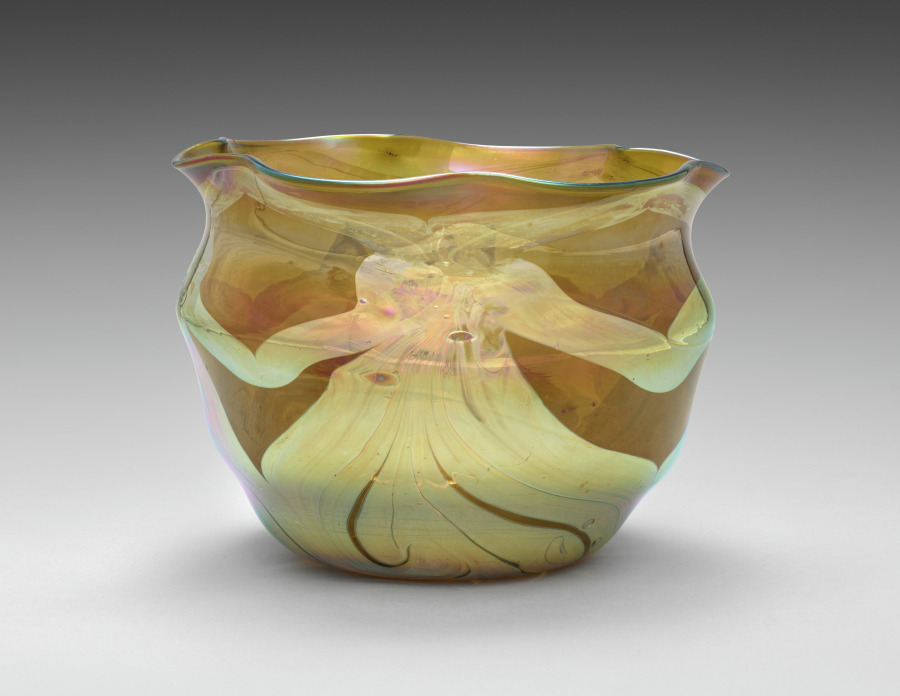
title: Bowl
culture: America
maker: Tiffany Glass & Decorating Company (America, New York, 1892–1902)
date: c. 1896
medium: Favrile glass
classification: Glass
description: Among his many achievements in the decorative arts, Louis Comfort Tiffany invented a type of glass with unprecedented opalescence that he patented under the name Favrile, derived from an Old English word meaning "handcrafted." Tiffany memorably described his Favrile glass as "distinguished by brilliant or deeply toned colors, usually iridescent like the wings of certain American butterflies, the necks of pigeons and peacocks, the wing covers of various beetles."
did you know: Located in Lake View Cemetery in Cleveland, Wade Memorial Chapel features an interior designed by Tiffany.